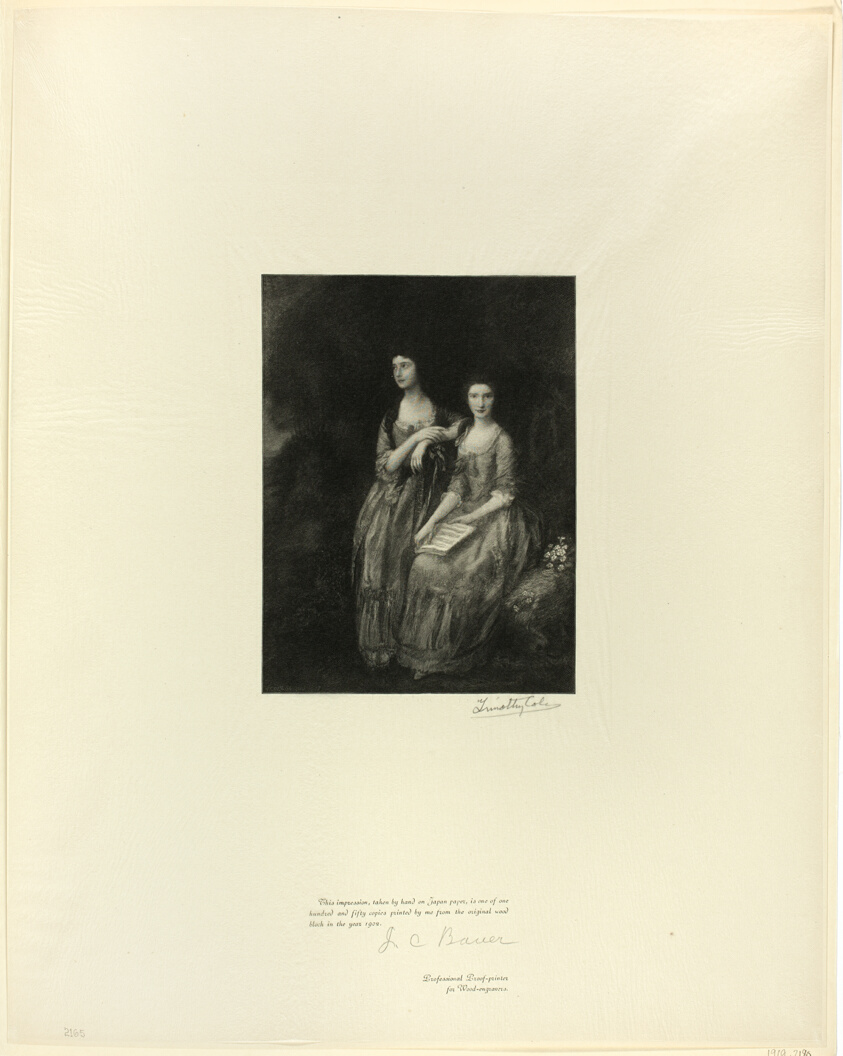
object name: Print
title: The Sisters: Mrs. Sheridan and Mrs. Tickell, from Old English Masters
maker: Timothy Cole (American, born England, 1852-1931); after Thomas Gainsborough (English 1727-1788)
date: 1897, printed 1902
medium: Wood engraving on chine paper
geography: United States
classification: wood engraving; print; prints and drawing